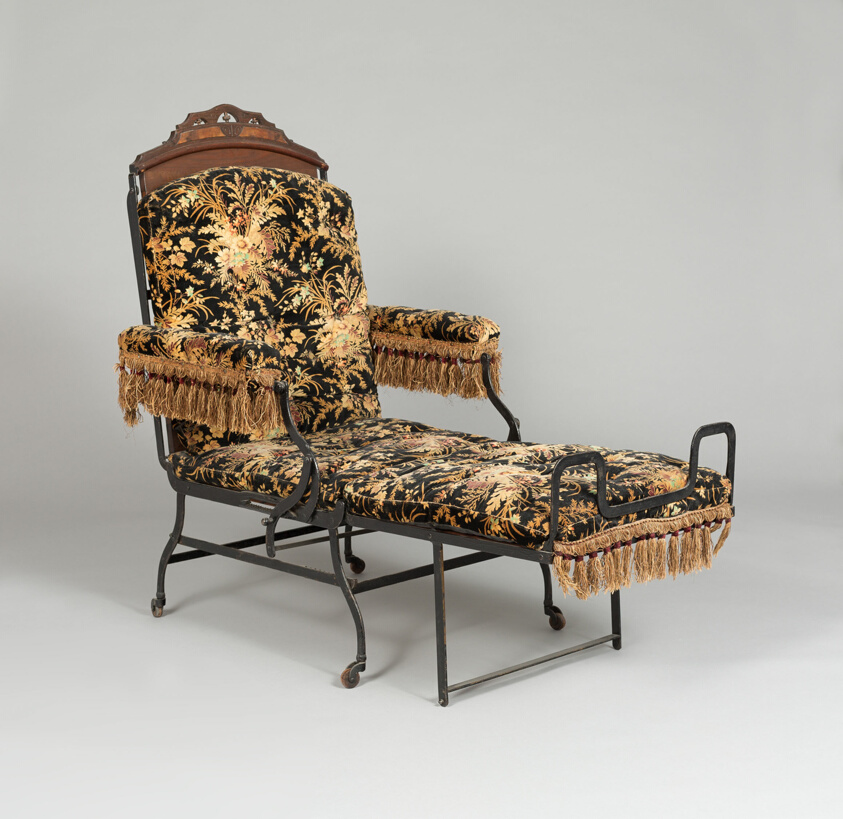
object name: Furniture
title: Chair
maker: Cevedra B. Sheldon; American, 1840–1895; Marks Adjustable Folding Chair Company; American, 1877–1897; New York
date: 1876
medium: Iron, walnut, cane, and upholstery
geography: New York City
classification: seating; chair; furniture; american decorative arts; american arts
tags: Chicago, furniture